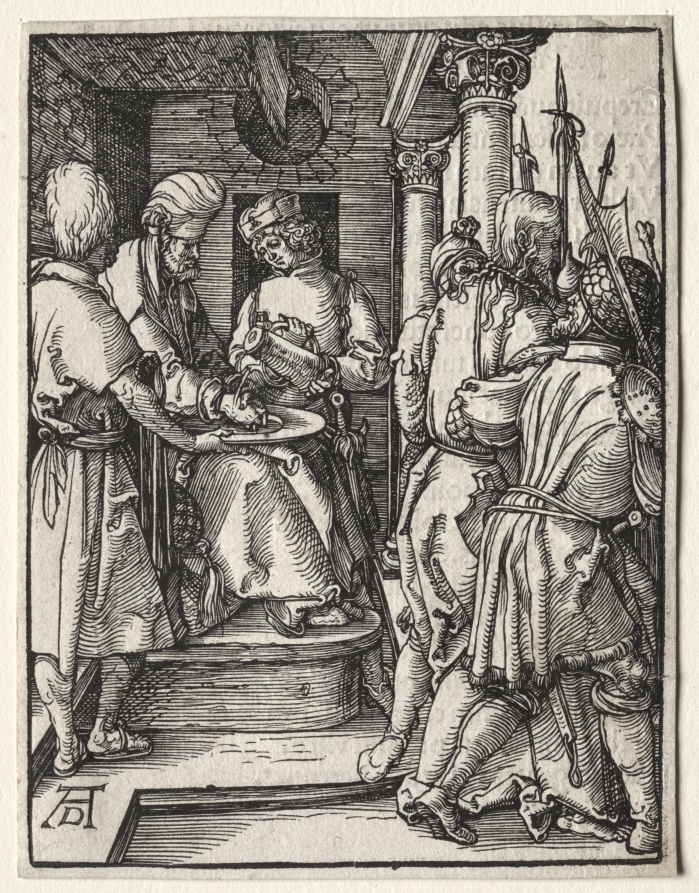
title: The Little Passion: Pilate Washing his Hands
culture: Germany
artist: Albrecht Dürer (German, 1471–1528)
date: 1509–1510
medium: woodcut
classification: Print